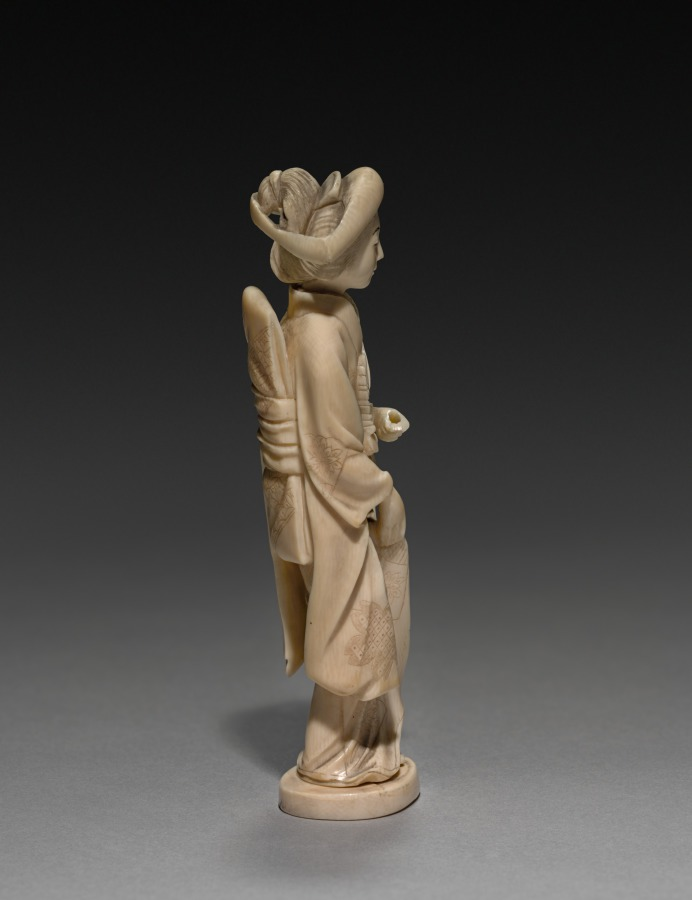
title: Woman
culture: Japan, Meiji period (1868–1912)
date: early 1900s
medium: ivory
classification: Ivory